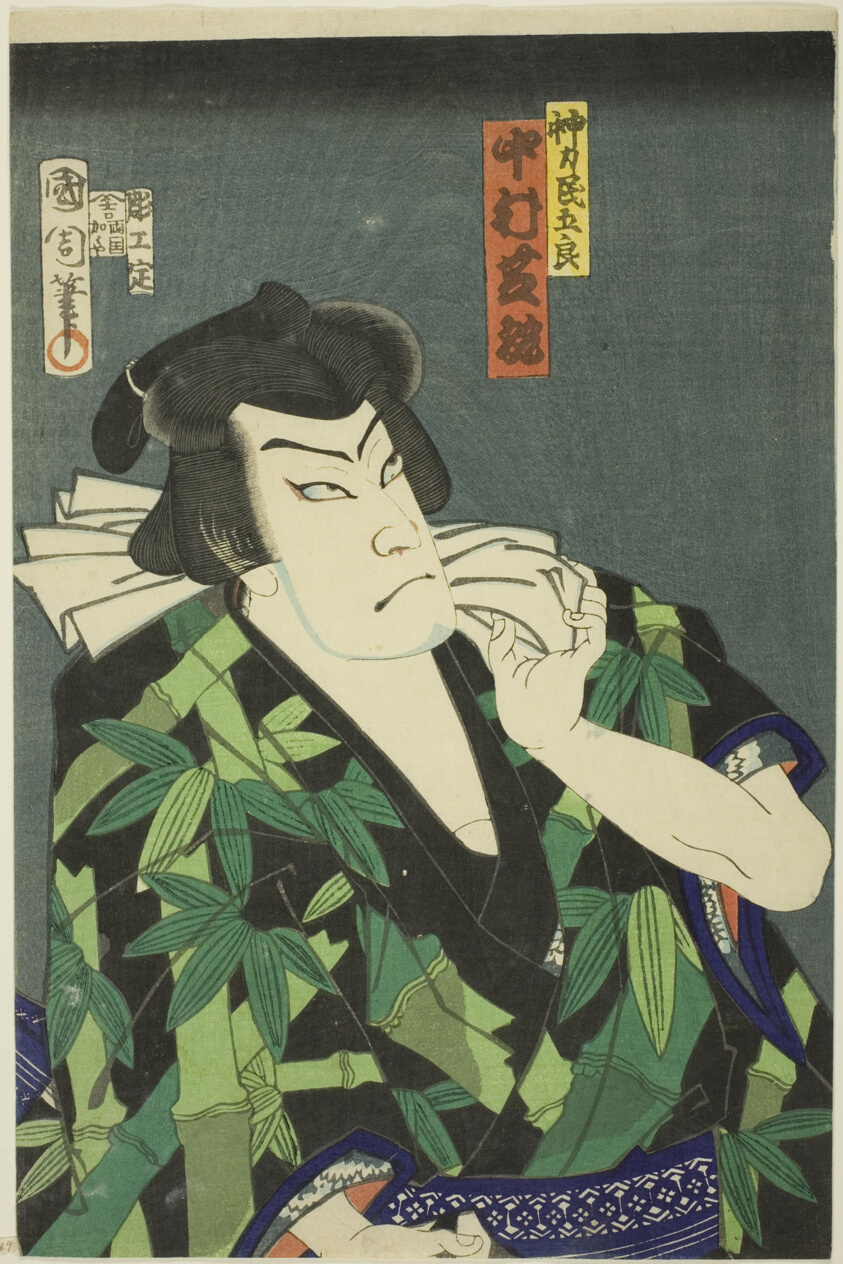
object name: Print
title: The Actor Nakamura Shikan IV as Jinriki Tamigoro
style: Japanese (culture or style)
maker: Toyohara Kunichika (Japanese, 1835-1900)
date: 1867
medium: Color woodblock print; oban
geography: Japan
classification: print; asian art